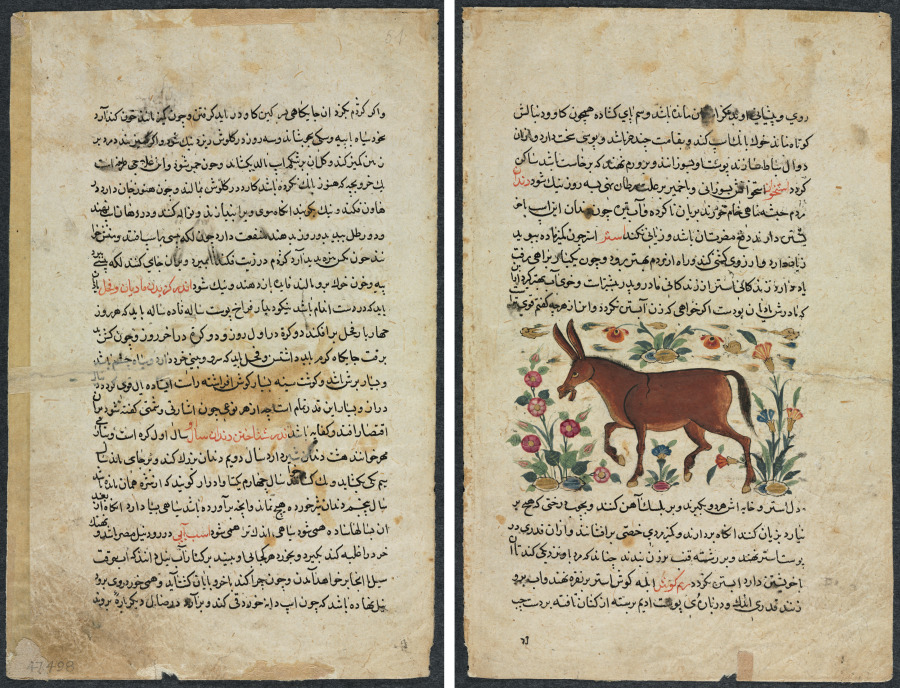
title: Text Page, Persian Prose (Recto); Khar (Ass) (Verso)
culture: Iran, Timurid Period, 15th century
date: 1400s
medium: ink and opaque watercolor on paper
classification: Manuscript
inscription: script: Naskh